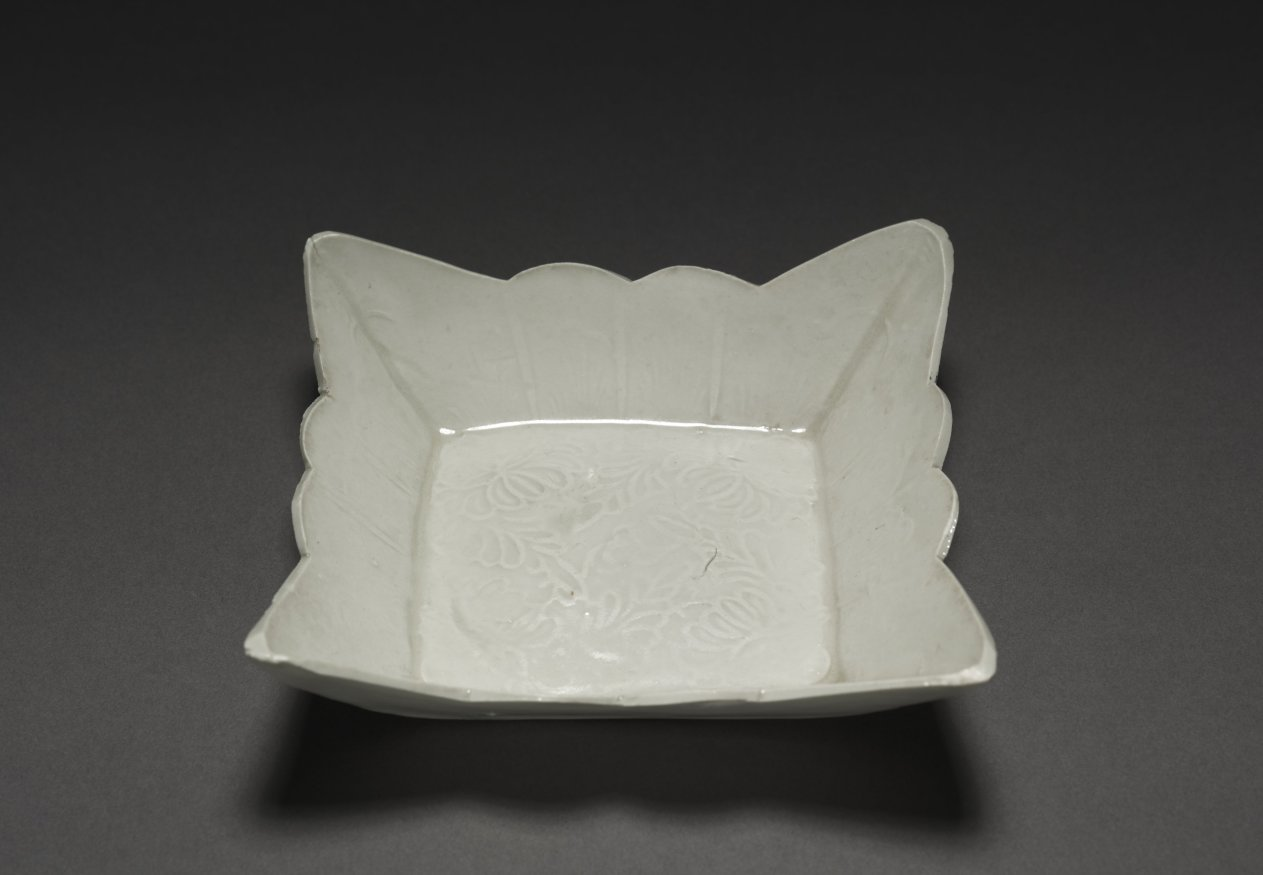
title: Square Dish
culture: Northeast China, Liao dynasty (916-1125)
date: 916–1125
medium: white porcelain with impressed decoration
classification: Ceramic